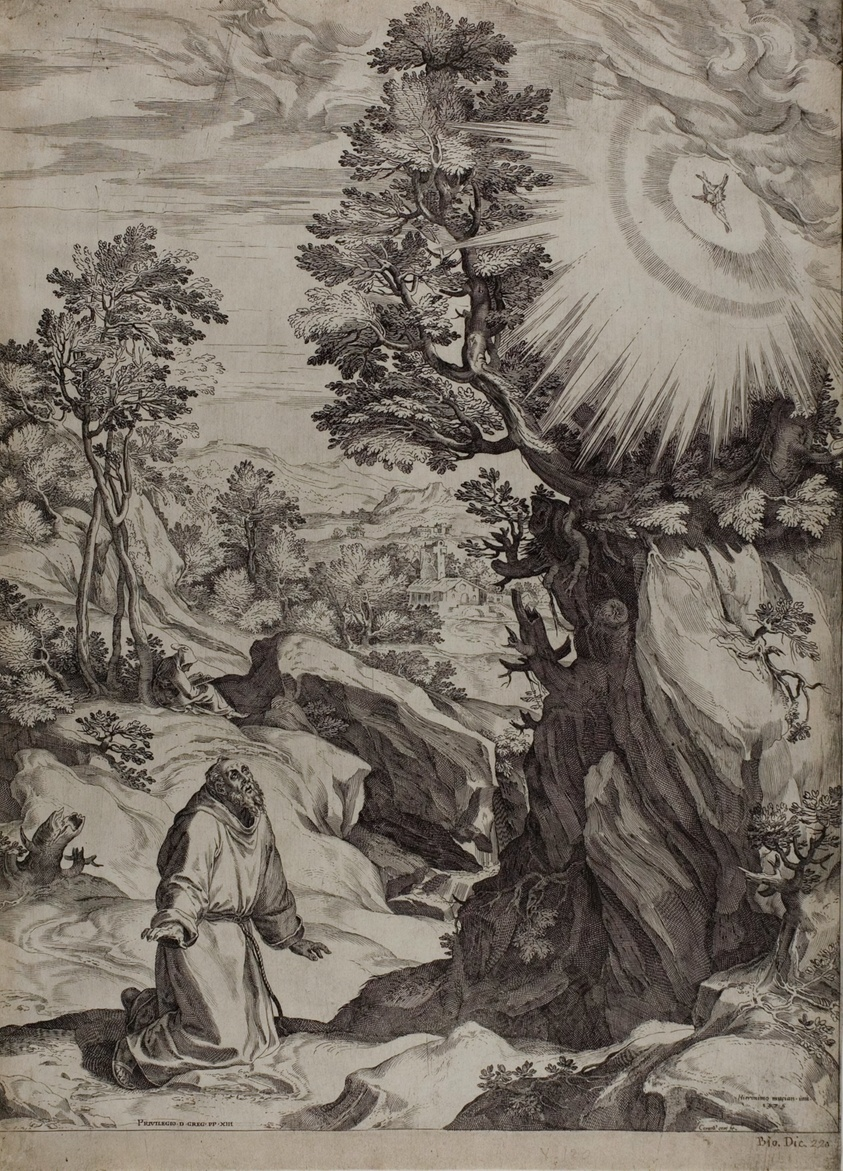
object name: Print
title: Saint Francis Penitent in a Large Landscape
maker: Cornelis Cort (Netherlandish, 1533/36-1578); Girolamo Muziano (Italian, 1528-1592)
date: 1575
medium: Engraving on paper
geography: Holland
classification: print; prints and drawing